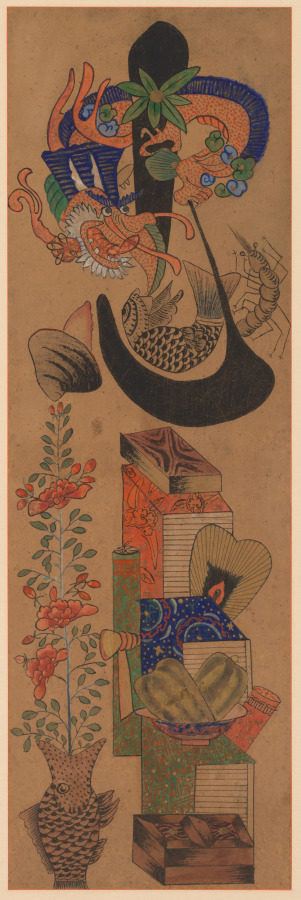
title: Munja-Chaekgeori Screen (Character-Books Screen)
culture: Korea, Joseon dynasty (1392–1910)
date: early 1900s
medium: Eight-panel folding screen, ink on paper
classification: Painting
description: This folding screen is a whimsical harmony of two different subjects: chaekgeori, or books and things; and munja, or characters. The lower section of each panel depicts the imagery of things, including books, decorative arts, and utilitarian objects. The upper portion of each panel bears a classical Chinese character. Read from far right to left, the eight characters refer to the values of Confucian teachings of the Joseon dynasty: filial piety, brotherly love, loyalty, trust, propriety, righteousness, modesty, and humility. While these two pictorial genres are harmoniously conjoined on the same picture plane, two sharply contrasting world views—urban consumerism and traditional Confucian ethics that despise materialism—compete with one another.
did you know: The eight Korean characters each mean filial piety, brotherly love, loyalty, trust, propriety, righteousness or justice, modesty or integrity, and humility or the feeling of shame.